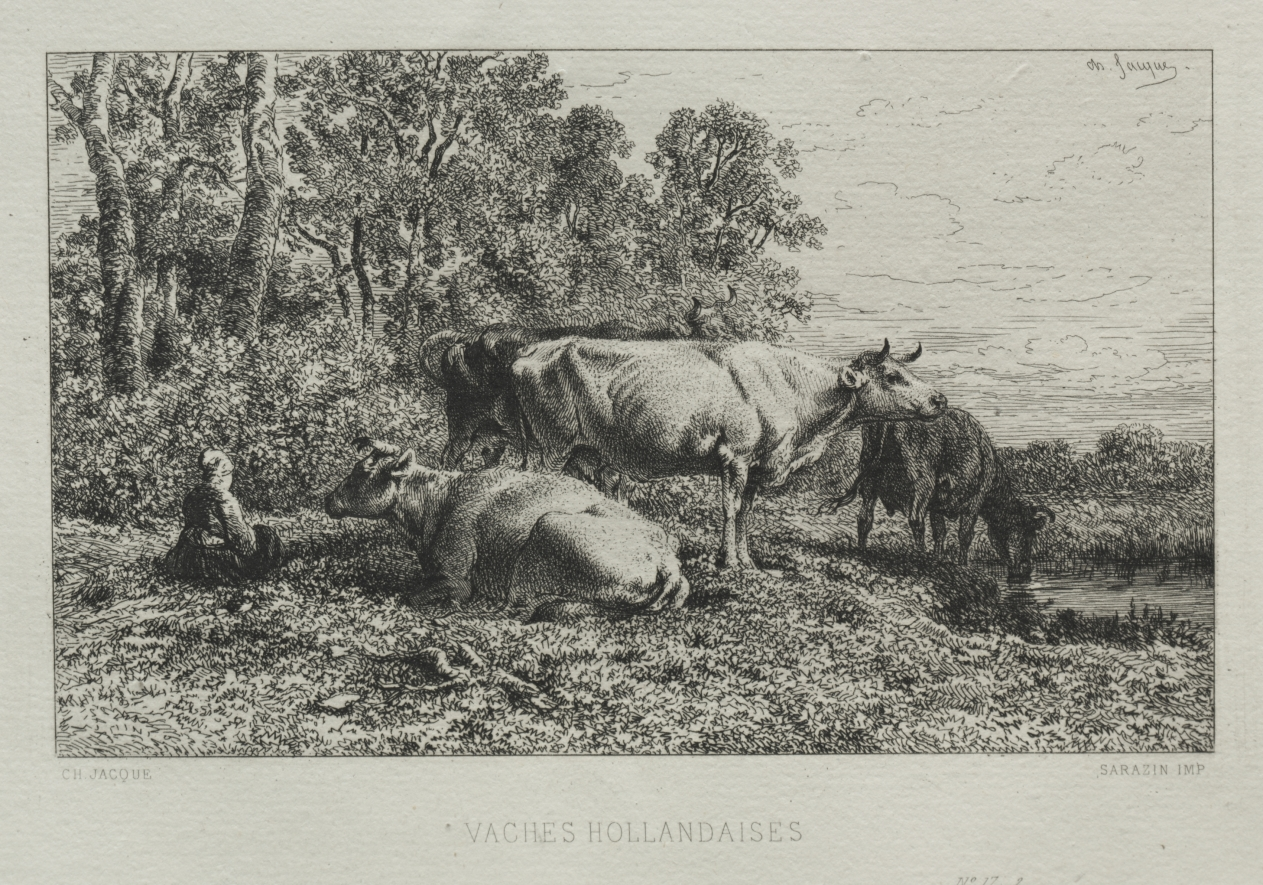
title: Holland Cows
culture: France, 19th century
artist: Charles-Émile Jacque (French, 1813–1894)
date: 1864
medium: etching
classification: Print